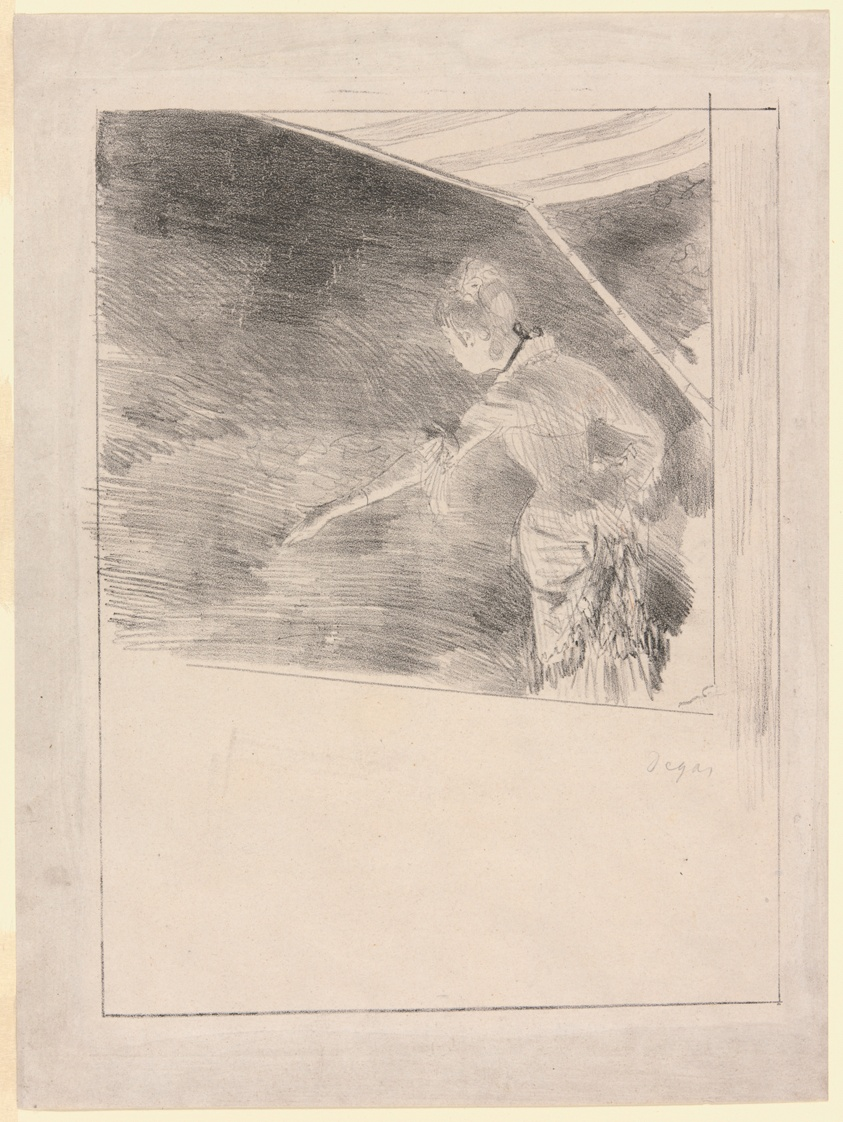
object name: Print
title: Singer at a Café-Concert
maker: Edgar Degas; French, 1834-1917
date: 1876–77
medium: Lithograph in black on off-white wove paper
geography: France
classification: lithograph; print; prints and drawing; paper